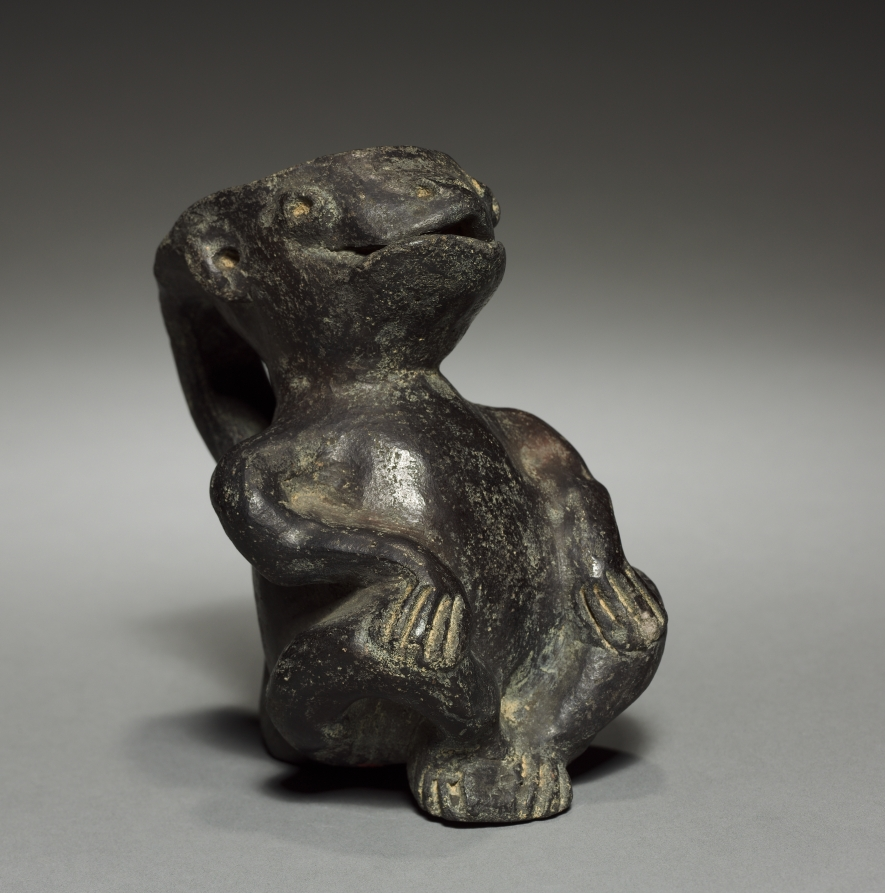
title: Seated Figure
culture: Colombia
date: before 1921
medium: pottery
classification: Ceramic